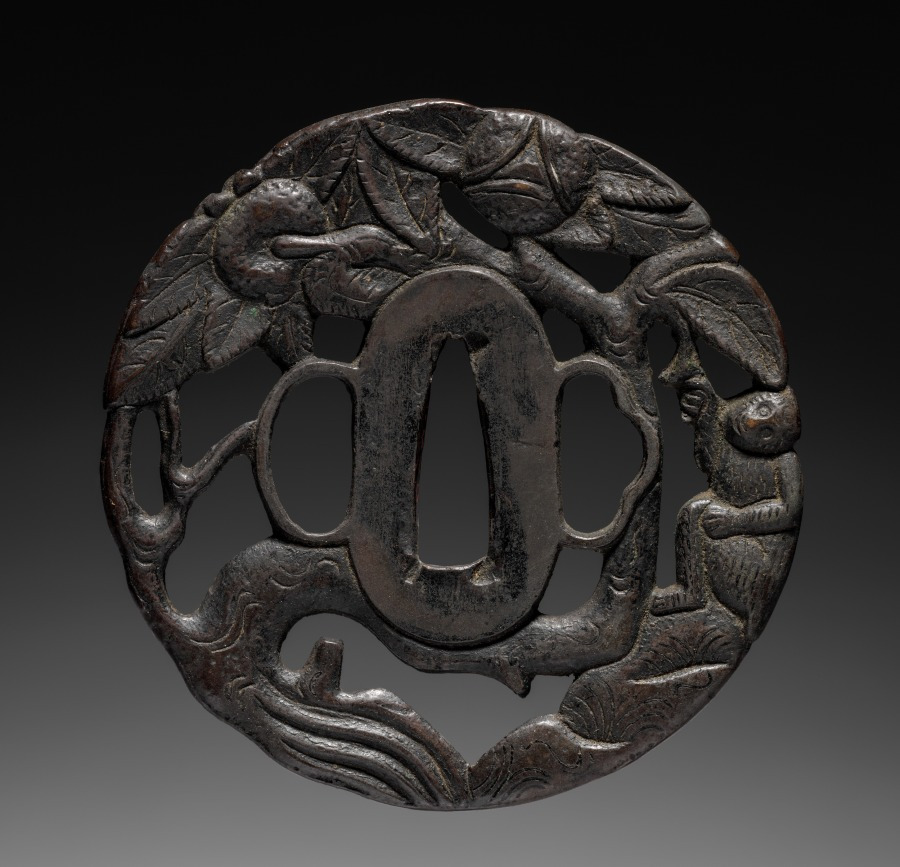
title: Sword Guard (Tsuba) with Monkey by Tree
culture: Japan, possibly Edo period (1615–1868)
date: c. 1615–1868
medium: metal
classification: Arms and Armor